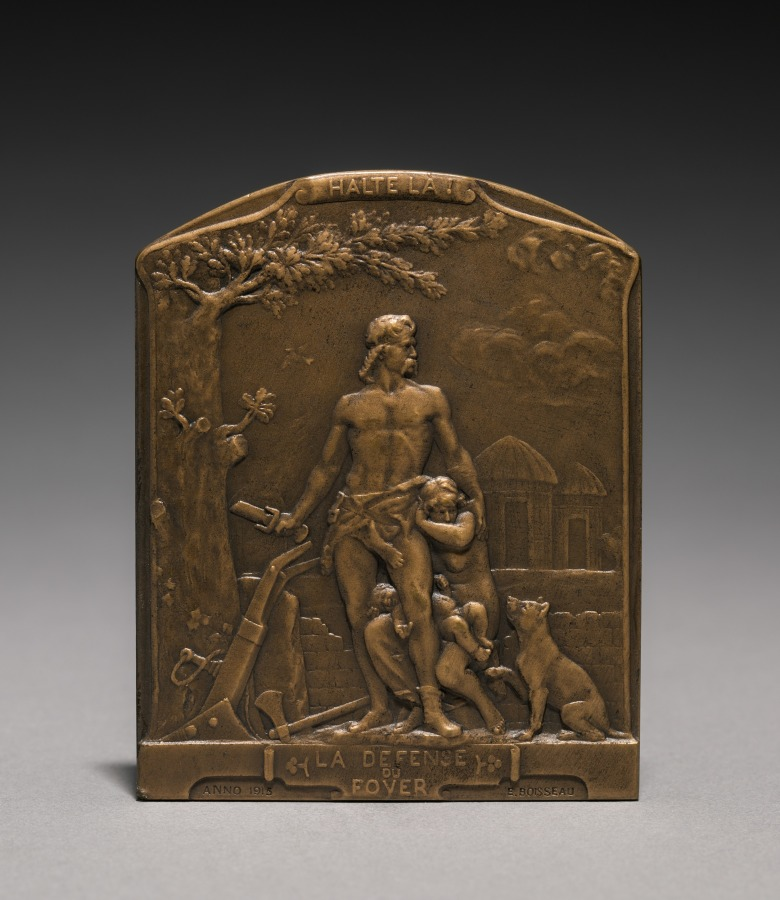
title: Medal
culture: France, 20th century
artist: Emile André Boisseau (French, 1842–1923)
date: 1914–1918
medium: bronze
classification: Metalwork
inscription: above: "Halte là"; below: "La defense du foyer."